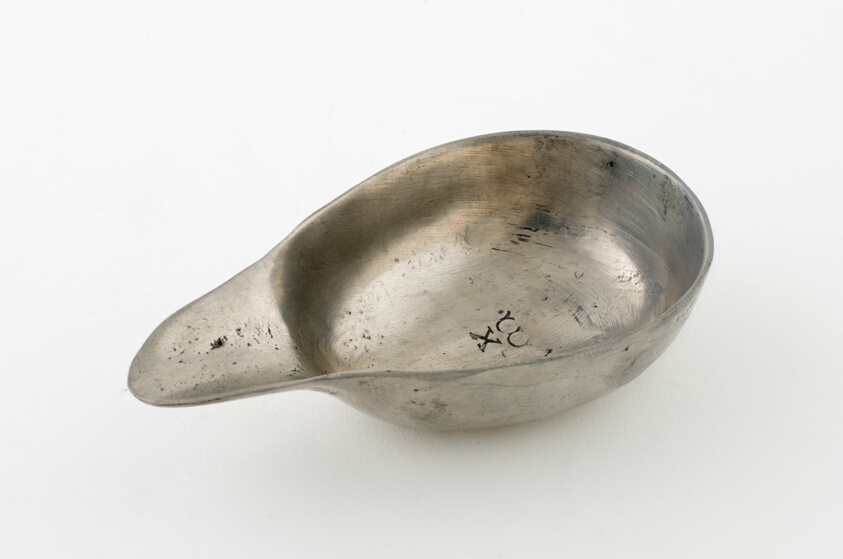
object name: Metalwork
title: Pap Boat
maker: England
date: Late 18th century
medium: Pewter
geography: England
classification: pewter; metalwork; european decorative arts